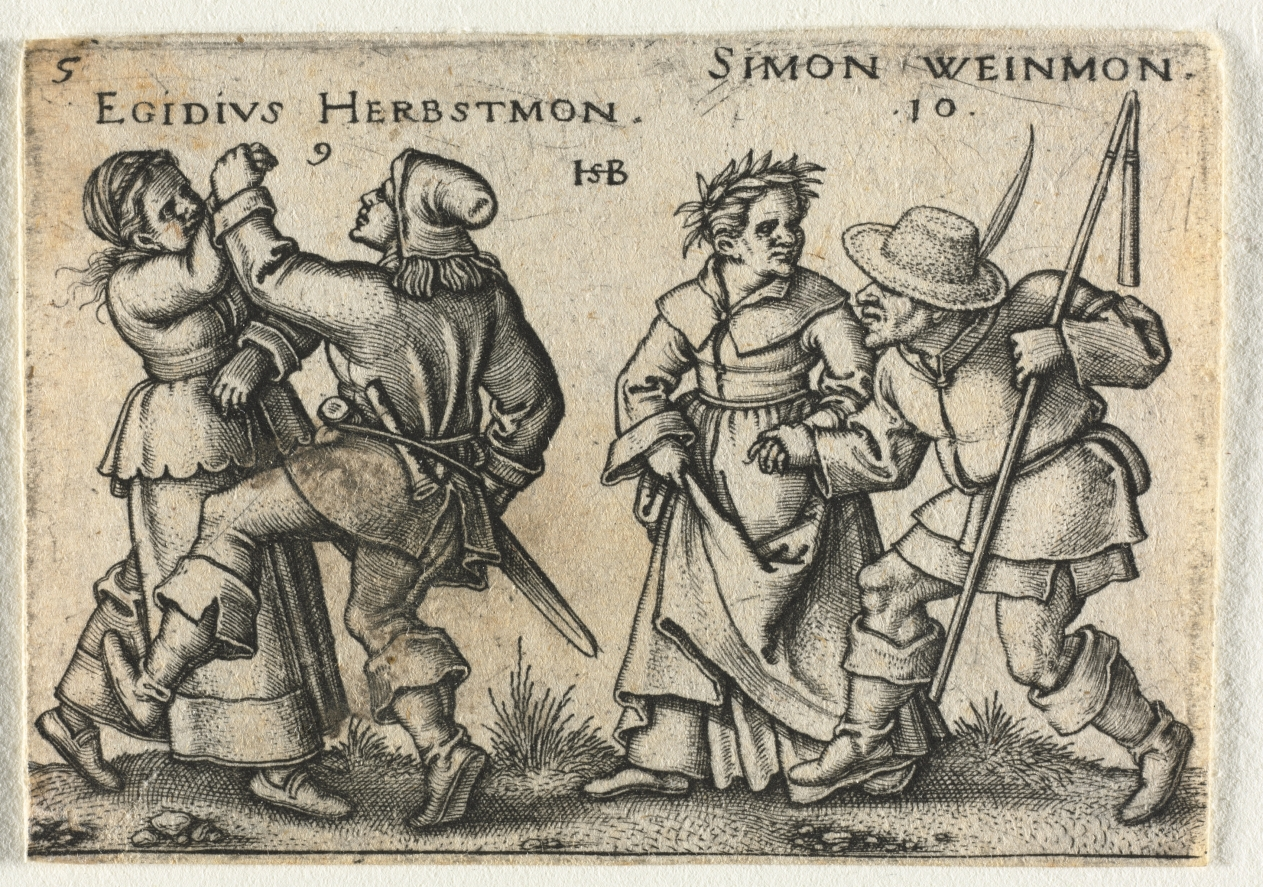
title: The Peasant Wedding or the Twelve Months: 9-Egidius Herbstmon 10-Simon Weinmon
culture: Germany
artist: Hans Sebald Beham (German, 1500–1550)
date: 1546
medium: engraving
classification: Print